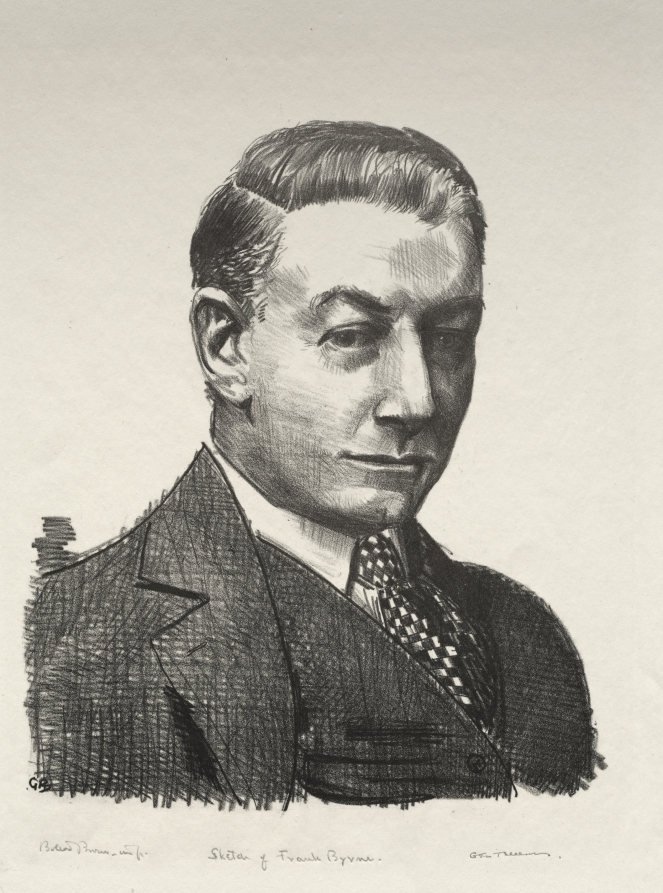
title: Sketch of Frank Byrne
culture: America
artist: George Bellows (American, 1882–1925)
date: 1923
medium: lithograph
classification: Print